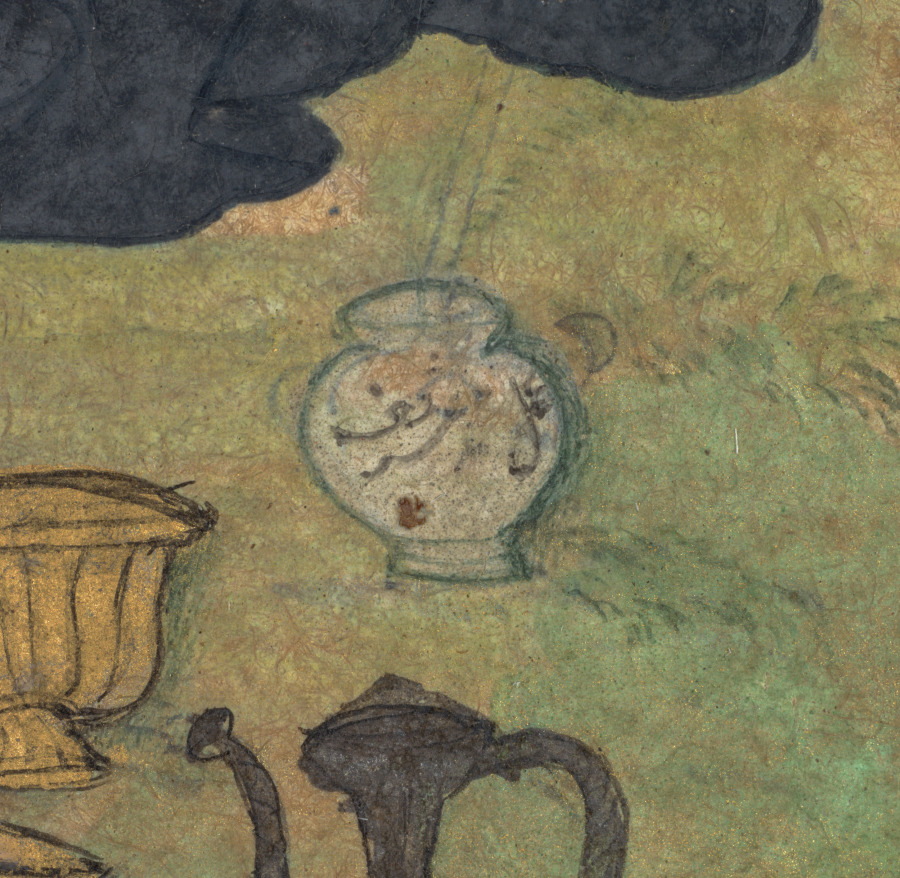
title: Angels bring food to Jesus in the wilderness (folio 55 recto), from a Mirror of Holiness (Mir’at al-quds) of Father Jerome Xavier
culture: Mughal India, Allahabad, made for Prince Salim (1569–1627)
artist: Muhammad Sharif (Indian, active c. 1600)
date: 1602–4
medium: Gum tempera, ink, color, and gold on paper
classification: Manuscript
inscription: Signature of the artist, Muhammad Sharif (Indian, active c. 1600), is written in the tiny pot by Jesus's foot.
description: To end his 40-day fast, five angels brought Jesus refreshments from heaven: breads, melons each with a knife for convenient cutting, fresh leeks, and what appear to be fragrant rice dishes and curries, along with cups of wine. Four of the angels are dressed in robes, and one is clothed only in feathers. After his baptism, Jesus spent 40 days and nights in the desert where he fasted, practiced spiritual exercises, and successfully resisted the temptations of Satan. Many of the rocks in this painting have faces, called grotesques. This page is the only surviving folio from this manuscript that has an artist’s signature, written in the tiny pot by Jesus’s foot.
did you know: The artist has put faces in the rocks, following a Persian convention.